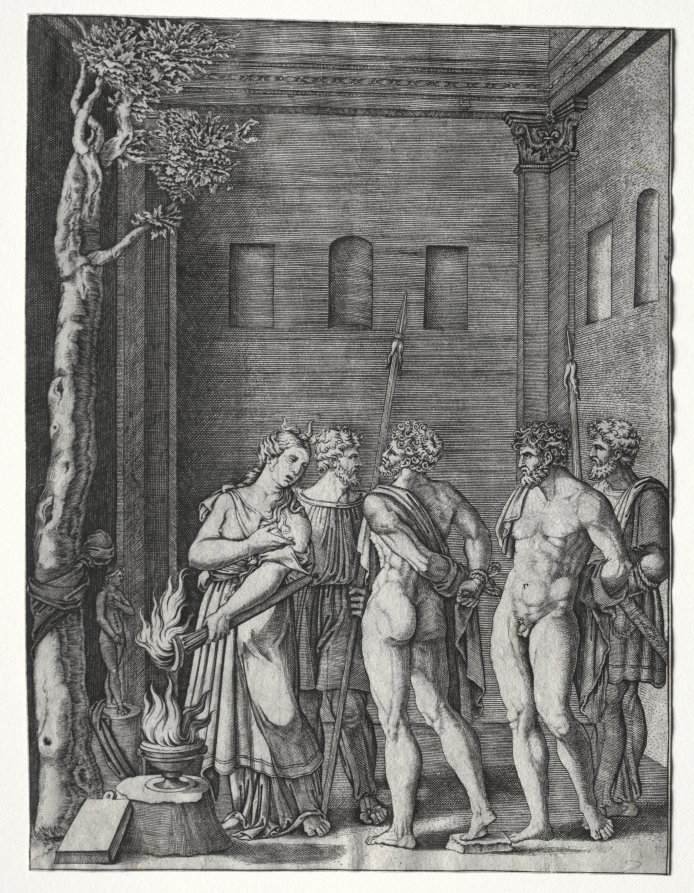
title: Orestes and Pylades brought to Iphigenia for Sacrifice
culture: Italy, 16th century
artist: Agostino Veneziano (Italian, 1490–1540)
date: 1514/1536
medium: engraving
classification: Print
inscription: VERSO, lower left, in graphite: T/-/- ; lower left, in graphite: 49/ ; lower left, in graphite: R112P ; lower left, in graphite: 197 ; lower center, in graphite: Augustin / Venetien ; lower right, in graphite: B XIV 194. ; lower right, in graphite: gg/- ; lower right, in brown ink: [illegible initials of Charles Marochetti, Lugt 392]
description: This scene comes from Greek mythology. According to one version of the story, Orestes (son of Agamemnon, king of Mycenae) and his companion, Pylades, were sent on a mission to retrieve a sculpture of the goddess Artemis. They were captured, however, and brought to the temple to be sacrificed. Luckily, the temple's high priestess, Iphigenia, turns out to be Orestes's sister, who he believed was sacrificed long before. Overjoyed by their reunion, Iphigenia saves Orestes and Pylades and helps them obtain the statue. Agostino Musi was born in Venice and was a pupil of Giulio Campagnola (about 1482–after 1514) before going to Rome, where he worked under Marcantonio until 1520.